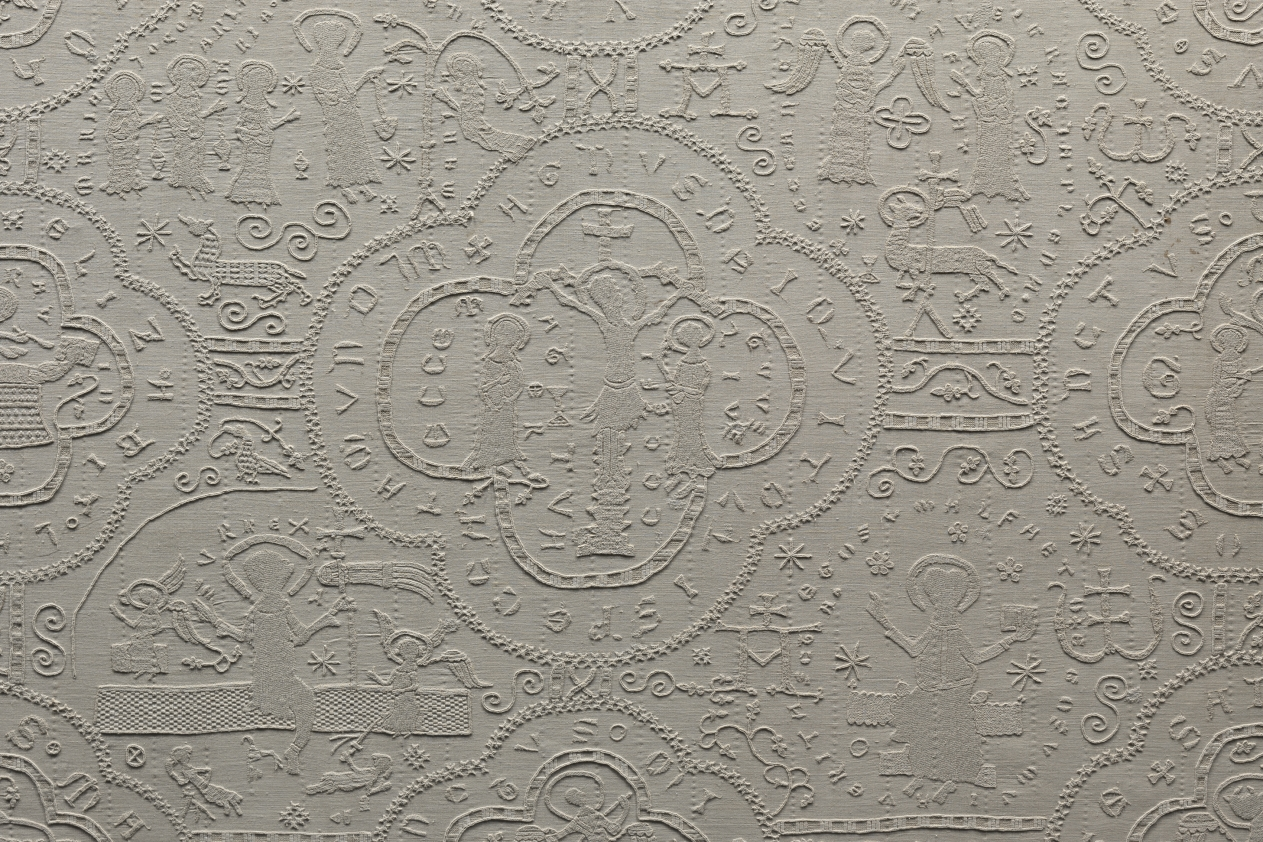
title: Altar Cloth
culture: Germany, Altenberg on the Lahn, Premonstratensian Convent, 14th century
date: c. 1350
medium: embroidery: linen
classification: Embroidery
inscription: various motifs enclosed in quatrefoils with identifying inscriptions in Gothic letters.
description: This large, embroidered altar cloth is one of the rarest, most important medieval church furnishings in existence. It was stitched by nuns in the Premonstratensian Convent in Altenberg on the Lahn River, north of Frankfurt, Germany, and was used to cover the church’s high altar in the weeks leading up to Easter. The cloth is an example of linen embroidery, a specialty of German nuns in the later Middle Ages. The Altenberg monastery church once had valuable furnishings; the high altar retable (a decorated frame with sculptures and paintings on the top of an altar) has survived, the main parts of which are now in the Städel Museum in Frankfurt, Germany.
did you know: When lit from behind, the previously hidden details emerge and the complex design becomes evident.